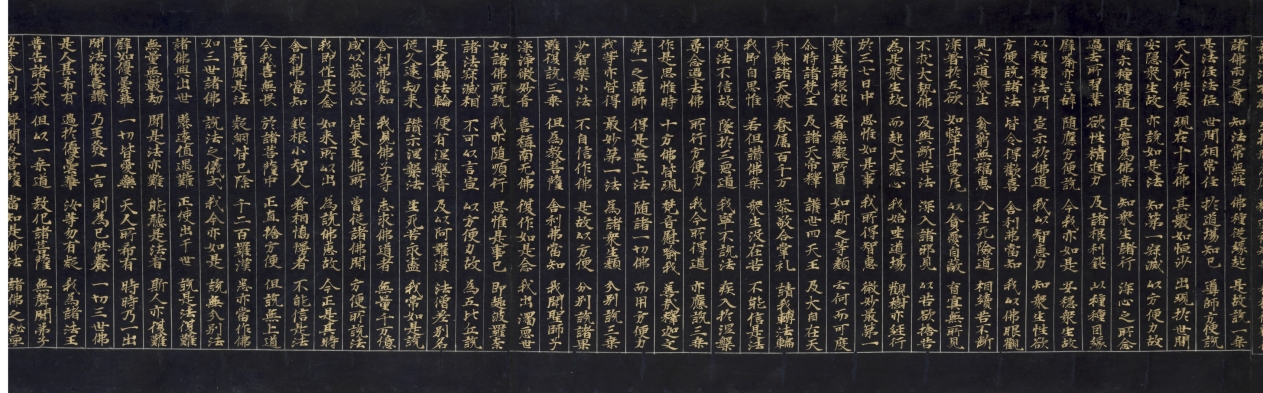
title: Lotus Sutra with a Frontispiece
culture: China, Song dynasty (960–1279)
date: late 1100s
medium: handscroll; gold ink on indigo sutra paper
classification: Painting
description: The frontispiece of this sutra, a sacred Buddhist scripture, illustrates episodes mentioned in the Buddha’s teaching. The sutra begins with a description of the historic Buddha Shakyamuni’s assembly on Vulture Peak. On the right, the Buddha sits amid members of his congregation: lohans (or arhats), bodhisattvas, gods, and other beings. The narrative proceeds from right to left. Heavenly light emanates from Shakyamuni’s brow to “illuminate the eighteen thousand worlds to the east.” Illustrated immediately below the ray is the sutra’s promise that if anyone carves or paints images of the Buddha “they will achieve the Buddha path.” The female figures in the frontispiece point to another promise made in this popular Mahayana school sutra, namely that female devotees and nuns who read the sutra are promised Buddhahood and salvation.